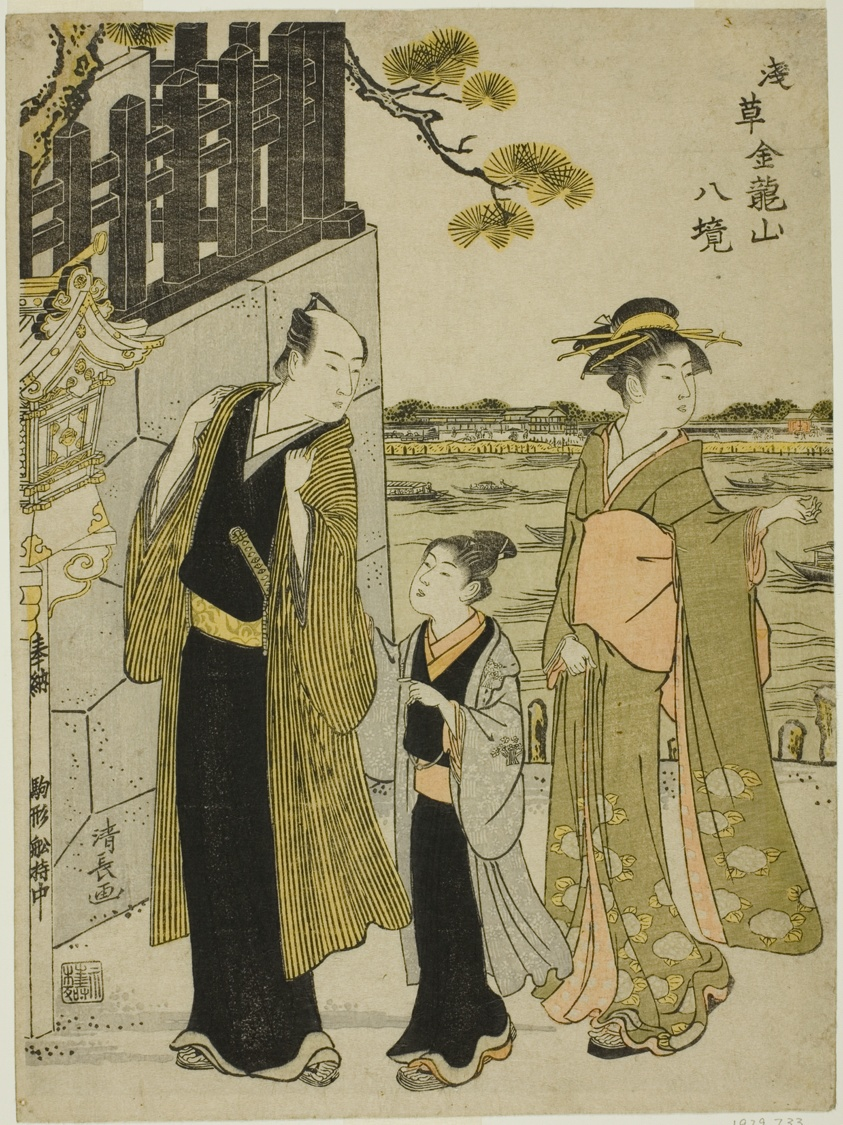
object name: Print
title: The View from Komagata Hall, from the series "Eight Precincts of Kinryuzan Temple in Asakusa (Asakusa Kinruzan hakkei)"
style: Japanese (culture or style)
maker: Torii Kiyonaga (Japanese, 1752-1815)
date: c. 1782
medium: Color woodblock print; chuban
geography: Japan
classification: woodblock print; print; asian art